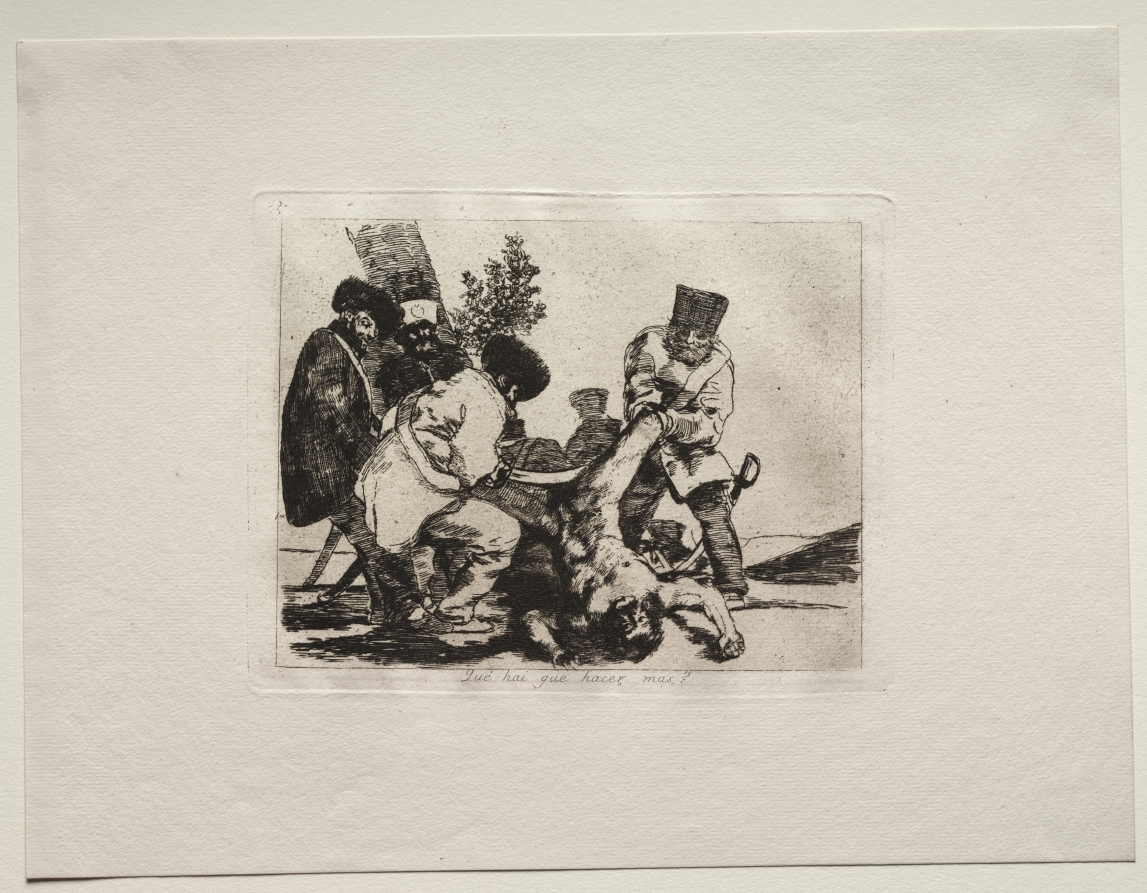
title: The Horrors of War: What More Can Be Done?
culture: Spain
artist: Francisco de Goya (Spanish, 1746–1828)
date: c. 1810–20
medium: etching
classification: Print